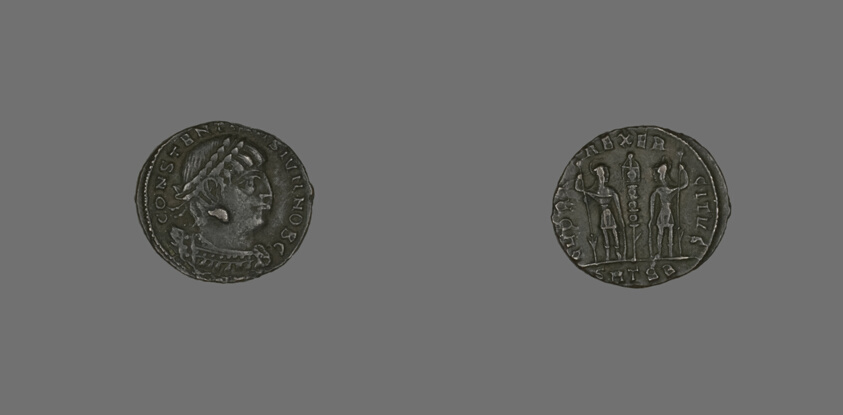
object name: Coin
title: Coin Portraying Emperor Constantine II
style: roman (ancient, style or period), ancient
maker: Roman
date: 317-337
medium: Bronze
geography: Roman Empire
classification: coin; ancient art